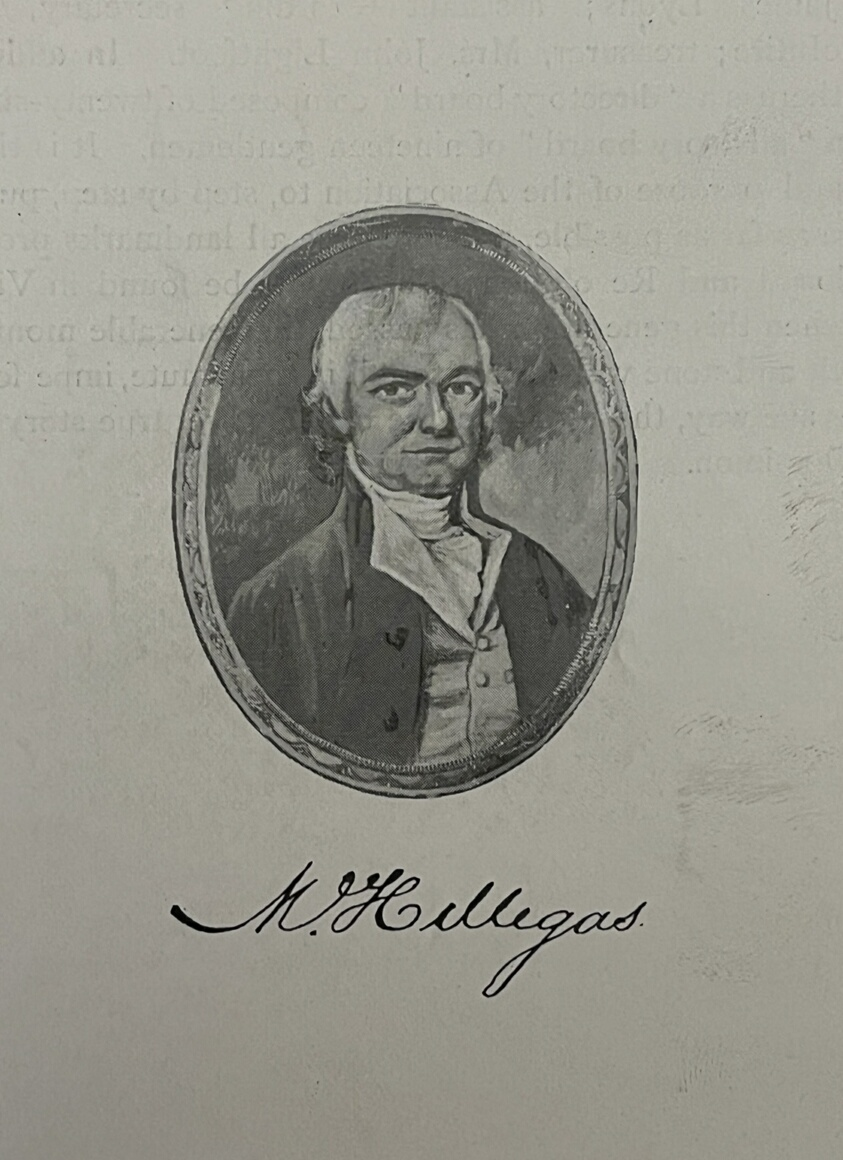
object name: Print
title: Michael Hillegas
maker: Artist Unknown (Likely American or British, 19th century)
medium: Lithograph on paper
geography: United States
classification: reproduction; print; prints and drawing